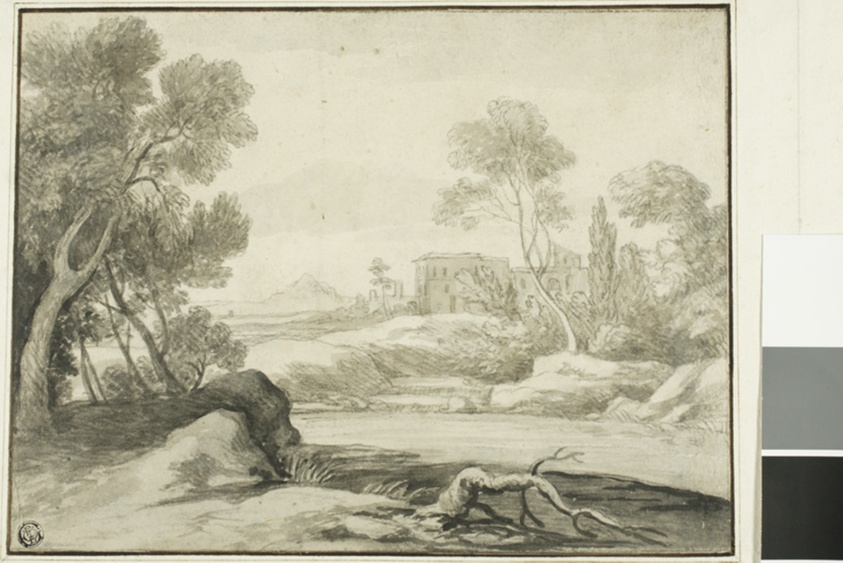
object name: Drawing and Watercolor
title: River Scene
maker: Claude Lorrain (French, 1600-1682); or Gaspard Dughet (French, 1615-1675)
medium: Brush and gray wash, over black chalk, on cream laid paper, laid down on ivory laid paper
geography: France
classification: brush and wash; paper; drawings (visual works); prints and drawing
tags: landscapes